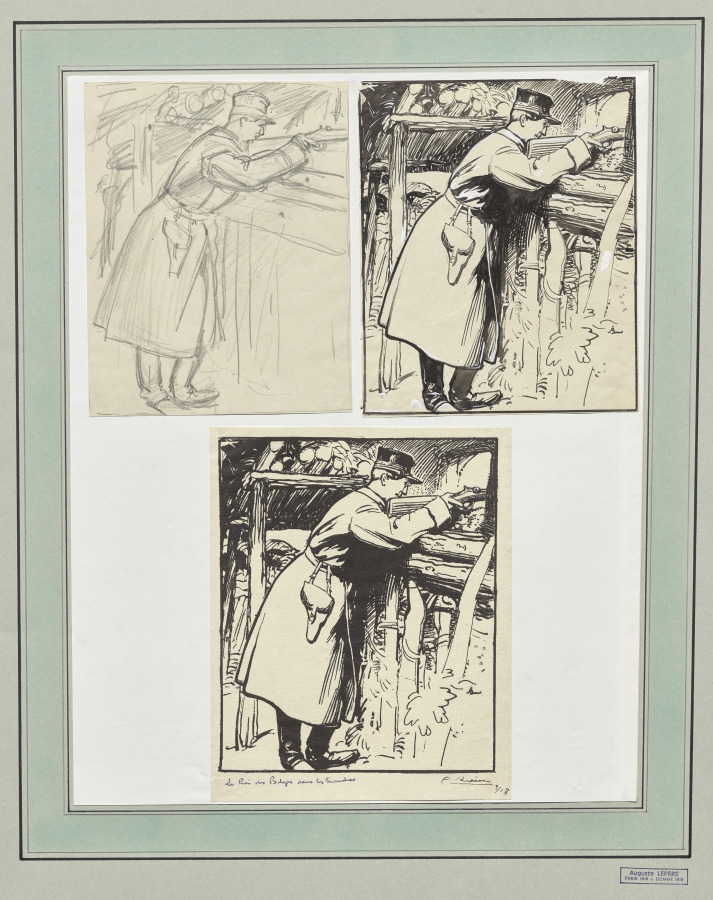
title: Le roi des Belges dans les tranchées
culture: France, 20th century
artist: Auguste Louis Lepère (French, 1849–1918)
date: 1914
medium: brush and black ink heightened with white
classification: Drawing